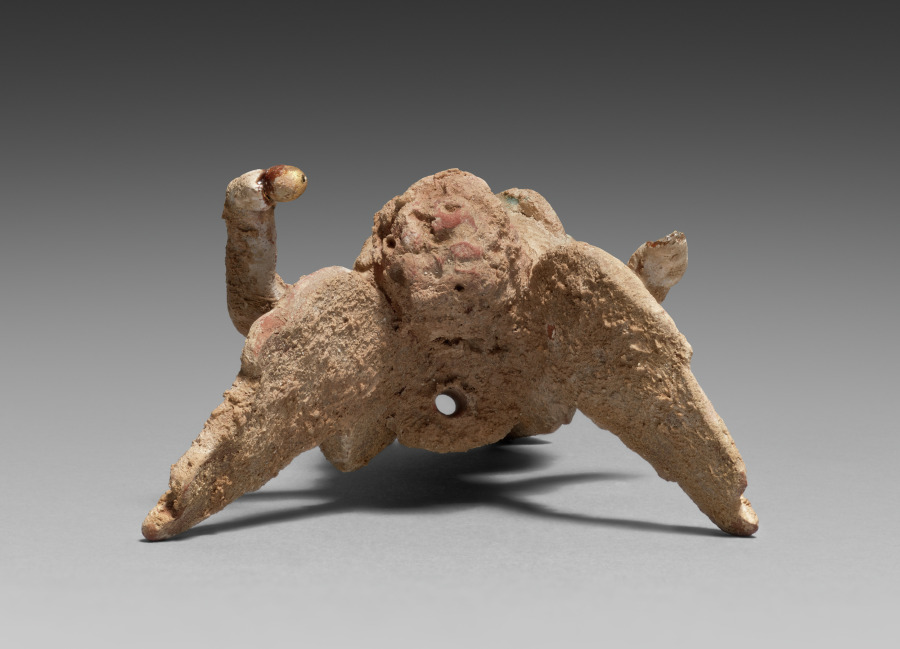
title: Figurine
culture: Greece, Myrina, Hellenistic period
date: late 400s–300s BCE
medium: terracotta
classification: Sculpture